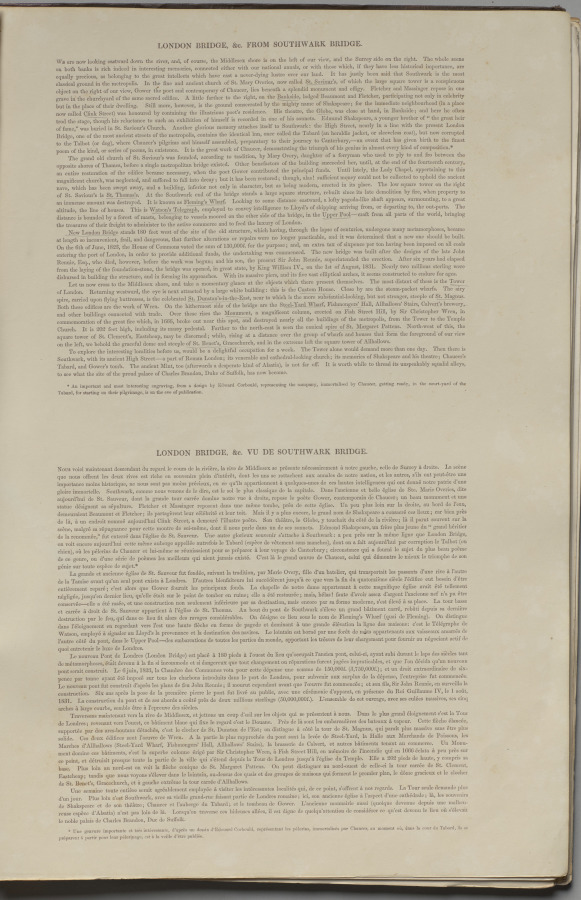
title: London As It Is: London Bridge, from Southwark Bridge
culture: England, 19th century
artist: Thomas Shotter Boys (British, 1803–1874)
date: 1842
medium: lithograph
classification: Bound Volume